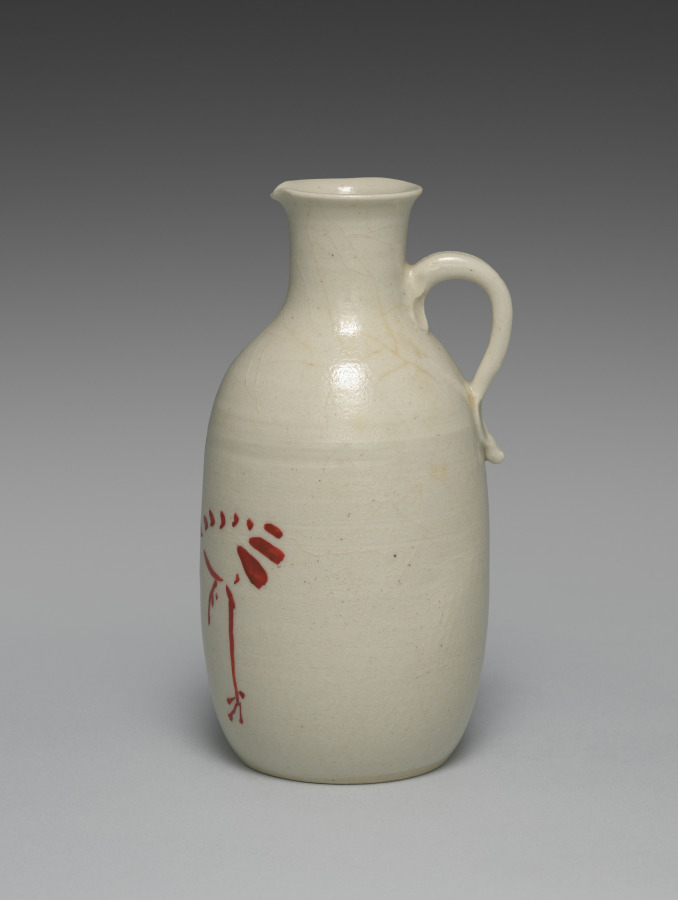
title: Crane Sake Pourer from Sake Pourers with Crane and Tortoises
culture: Japan, Meiji period (1868–1912)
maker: Seifū Yohei III (Japanese, 1851–1914)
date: 1893–1914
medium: One of a pair of sake flasks; porcelain with overglaze color enamel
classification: Ceramic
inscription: 爭食羣雞前，同遊者同志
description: This flask has a crane with a leg raised, while the other flask of this pair has stencil-like paintings of three turtles—a young one with its parents. Cranes and turtles are well-recognized symbols of longevity in East Asia, with the turtle said to live for ten thousand years and the crane for one thousand. Each flask also has a poem on the back, one in Chinese and the other in Japanese. The Chinese poem on this crane flask is two nonconsecutive five-character lines from a poem called “Crane Feelings” by the famous Tang dynasty poet Bai Juyi (772–846). One character in one of the lines has been altered. This creative poetic sampling results in a verse reading zheng shi qun ji qian, tong you zhe tong zhi 爭食羣雞前，同遊者同志. It could perhaps be translated, “before the flock of chickens competing for food, those traveling together have the same ambitions.”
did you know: This pair of seemingly humble sake pourers celebrate longevity and delight in a literary tradition that embraces multiple forms of poetic expression.